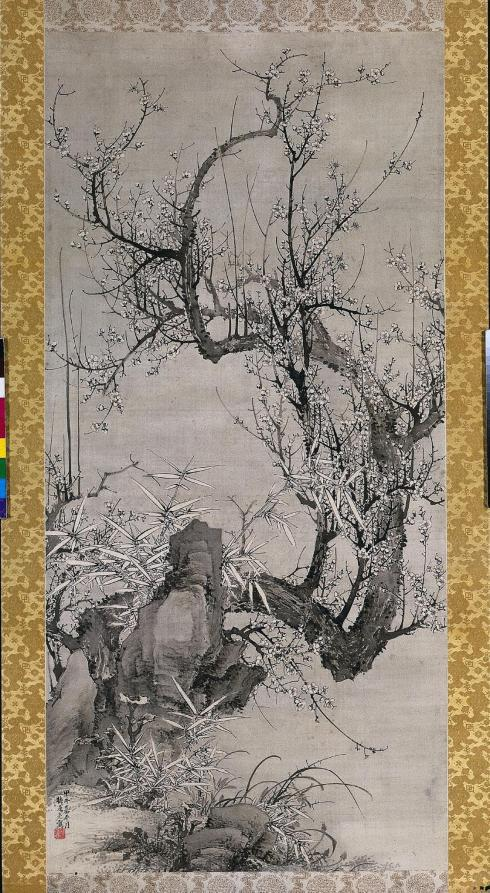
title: Plums, Bamboo, and Orchid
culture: Japan, Edo period (1615–1868)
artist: Yamamoto Baiitsu (Japanese, 1783–1856)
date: 1834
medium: hanging scroll; ink on silk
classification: Painting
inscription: date and signature at lower left.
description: This painting represents three of the plants known as the Four Gentlemen of Chinese painting; it lacks only autumn’s chrysanthemum. The plants’ characteristics are symbols of Confucian virtues, such as open-mindedness (bamboo), strength in the face of adversity (plum), and humility (orchid).